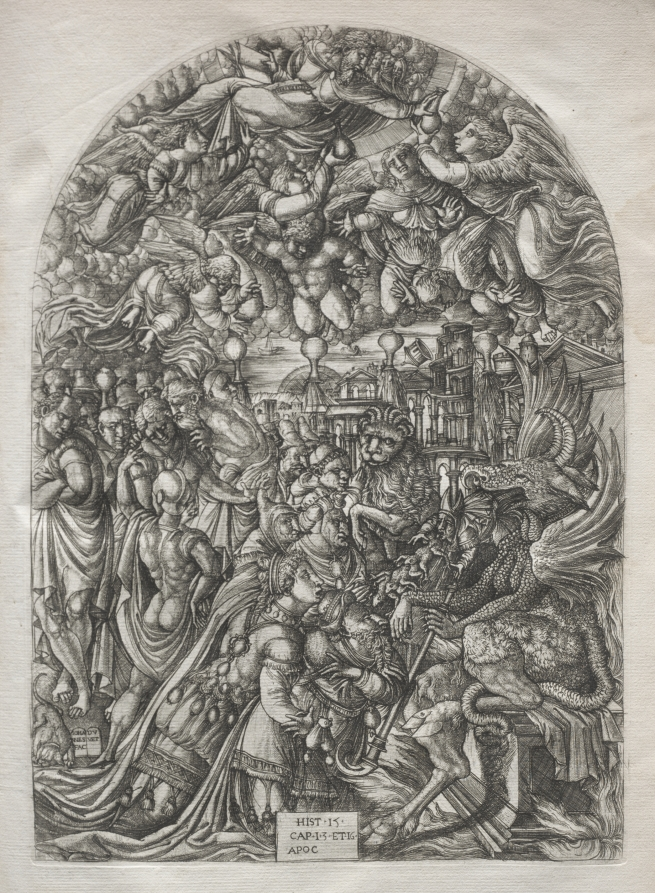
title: The Apocalypse: The Dragon with Two Horns and the Beast with Seven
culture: France, 16th century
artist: Jean Duvet (French, 1485–1561)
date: 1546–1556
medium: engraving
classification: Print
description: This print is part of a bound volume of works illustrating the a narrative of the Apocalypse, taken from the Revelation of Saint John in the Bible. The 23 engravings in the series occupied the artist for a number of years and represent his greatest artistic achievement. The museum's volume is one of only seven known complete sets. Jean Duvet was one of the first major printmakers in France and one of the most original artists of the 1500s. Although he worked mostly in the provincial city of Langres, he became aware of Italian art through the circulation of prints—notably those of Marcantonio Raimondi. His solidly modeled human figures reflect the influence of the Italian High Renaissance. Duvet, however, developed an idiosyncratic, highly artificial style with crowded compositions that ignore rational space in favor of ornamental surface patterns.